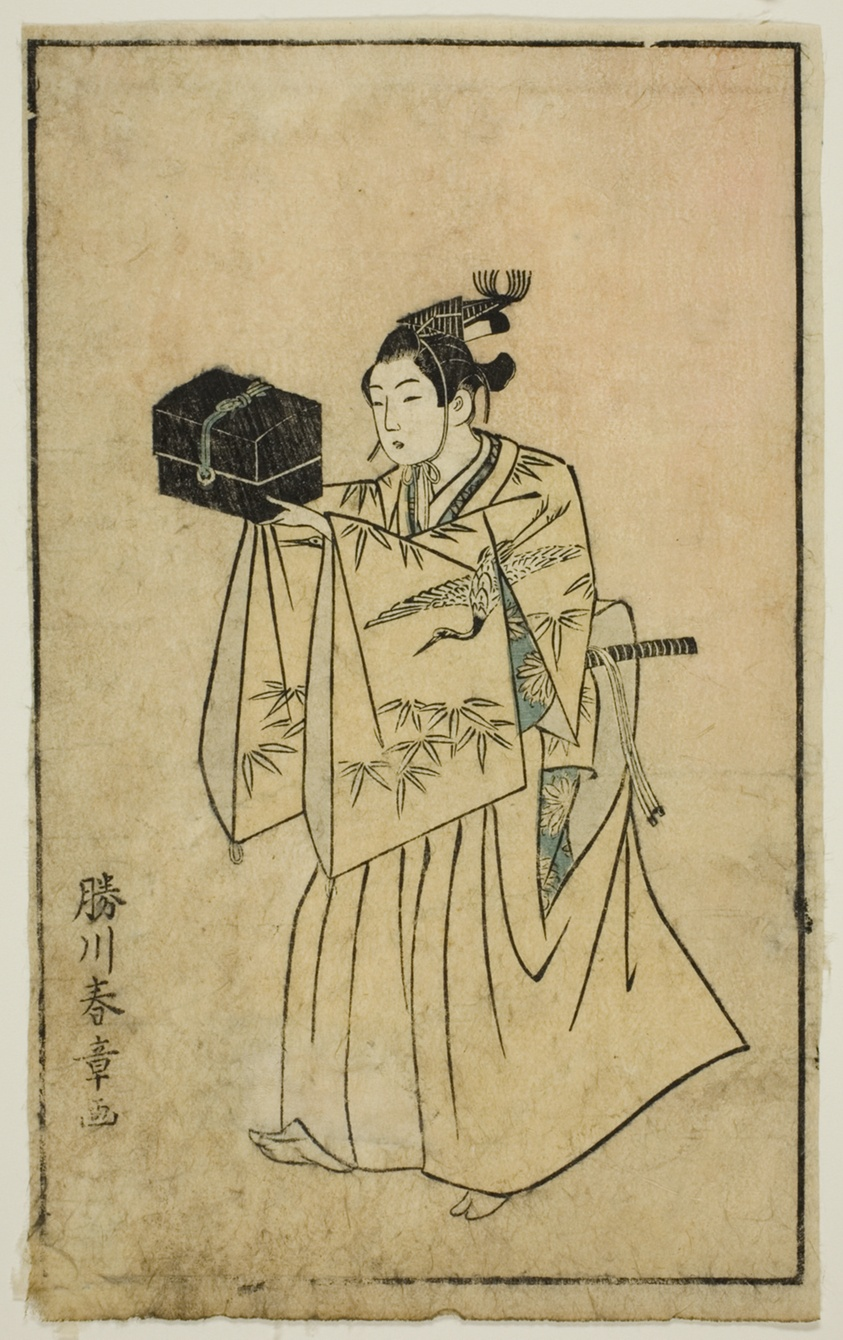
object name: Print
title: An Actor as Senzai, from "A Picture Book of Stage Fans (Ehon butai ogi)"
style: Japanese (culture or style)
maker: Katsukawa Shunsho 勝川 春章; Japanese, 1726-1792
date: 1770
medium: Color woodblock print; page from illustrated book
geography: Japan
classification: woodblock print; print; asian art